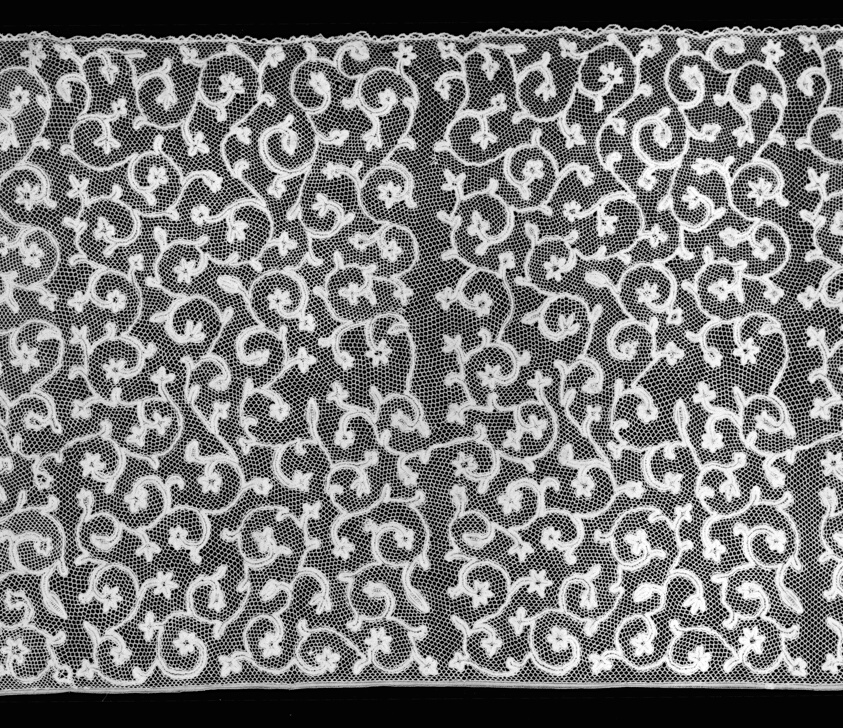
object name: Textile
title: Flounce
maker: Italy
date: 1701/50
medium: Linen, bobbin part lace; continuous clothwork tapes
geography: Italy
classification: textile; lace - bobbin